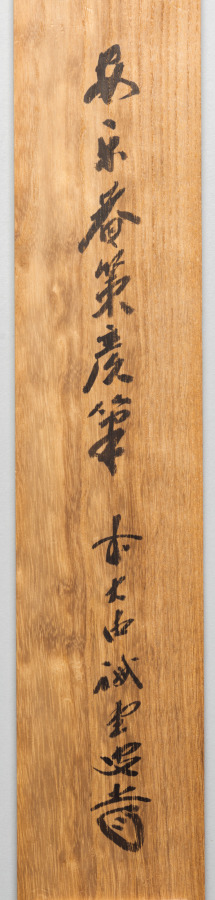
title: Sacred Name of Tenjin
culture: Japan, Muromachi period (1392–1573)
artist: Sakugen Shūryō (Japanese, 1501–1579)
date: 1500s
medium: hanging scroll; ink on paper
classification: Calligraphy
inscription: signed: signature unread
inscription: Sealed: Sakugen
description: The story emerged in the early 1300s that the kami Tenjin had traveled to China and achieved enlightenment under a famous Buddhist meditation master. Paintings of the subject as well as written invocations of Tenjin’s name were highly valued by the monks of Japan’s Zen Buddhist communities, to which an invocation of Tenjin’s name brushed by Zen monk Sakugen Shūryō attests. Sakugen was both a poet and an official envoy to Ming China in the 1500s. Creating calligraphies of deities’ names was akin to painting religious icons.